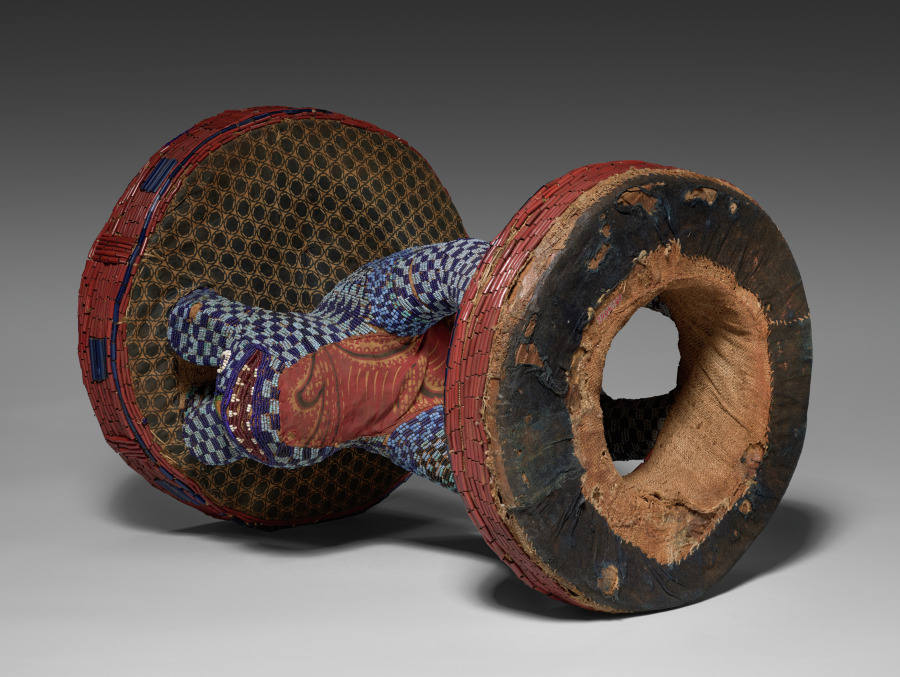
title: Prestige stool (Kuo fo)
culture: Africa, Central Africa, Cameroon, Bandjoun Kingdom, Bamileke makers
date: possibly 1800s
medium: Wood, cotton, plant fiber, glass beads, and indigo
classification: Furniture and woodwork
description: Bead-covered wooden stools and thrones are one of the most prevalent art forms among the various kingdoms and chiefdoms in the Cameroon Grassfields region. This example, once part of the royal treasury, belongs in the category of "travel stools," usually used in conjunction with more private, minor ceremonies and rituals at the palace. The leopard imagery confirms the object’s royal status. It alludes to the belief that the king could temporarily transform himself into this feared predator.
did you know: The beads on this stool were sewn on by hand. Look underneath the stool, however, and you can see commercially made printed fabric.